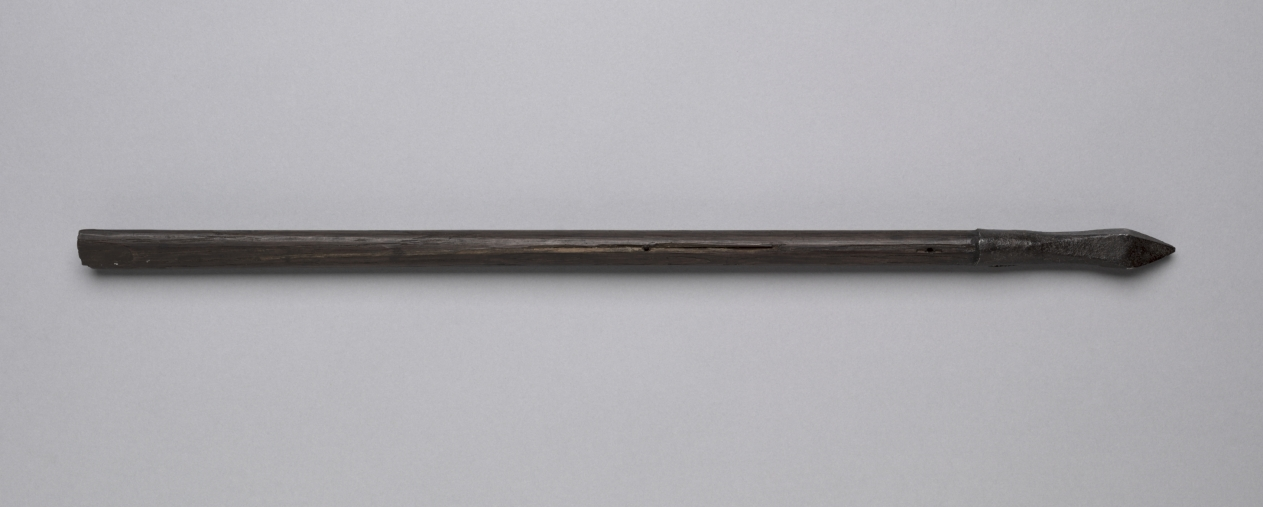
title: Crossbow Bolt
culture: Germany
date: 1500s-1600s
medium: wood, leather, steel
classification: Arms and Armor